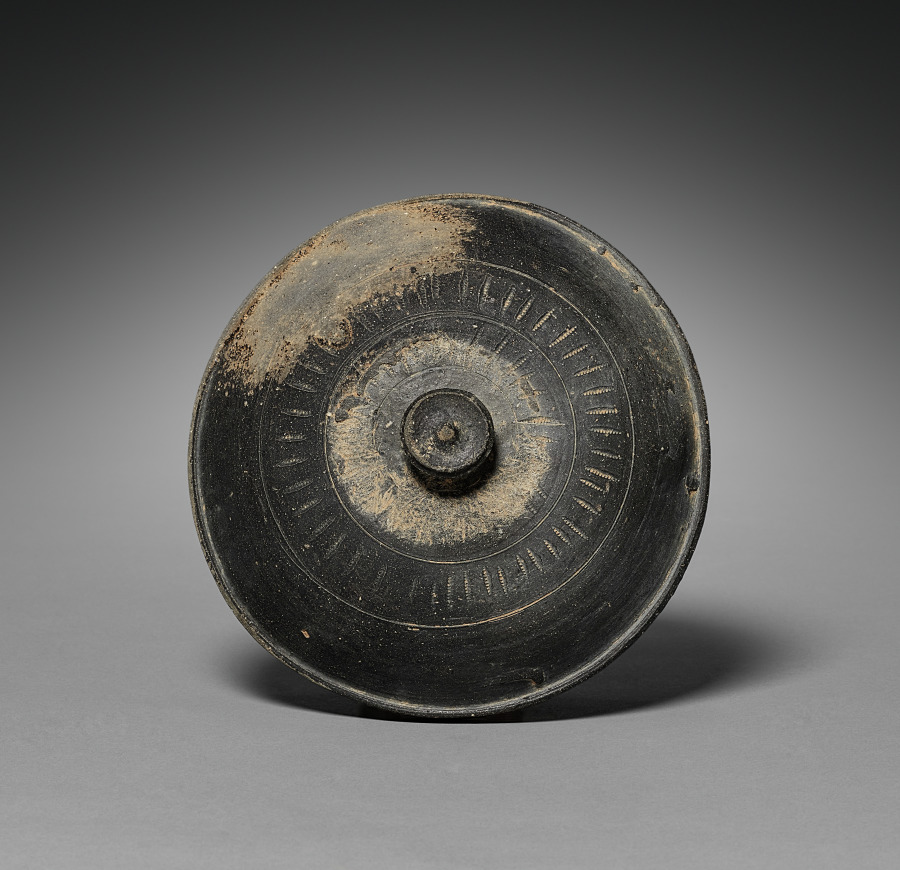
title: Lidded Cup with Strap Handles (lid)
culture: Korea, Gaya period (42–562 CE)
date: 300s–400s CE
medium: stoneware with natural ash glaze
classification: Ceramic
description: Pottery vessels with a footed stand such as this one is the earliest known high-fired ware. Its gray color is the result of the reduction of oxygen in the closed kiln chamber. Footed vessels were not for everyday usage, but rather served to present offerings to the deceased.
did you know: This is a lid for a ritual pottery vessel.